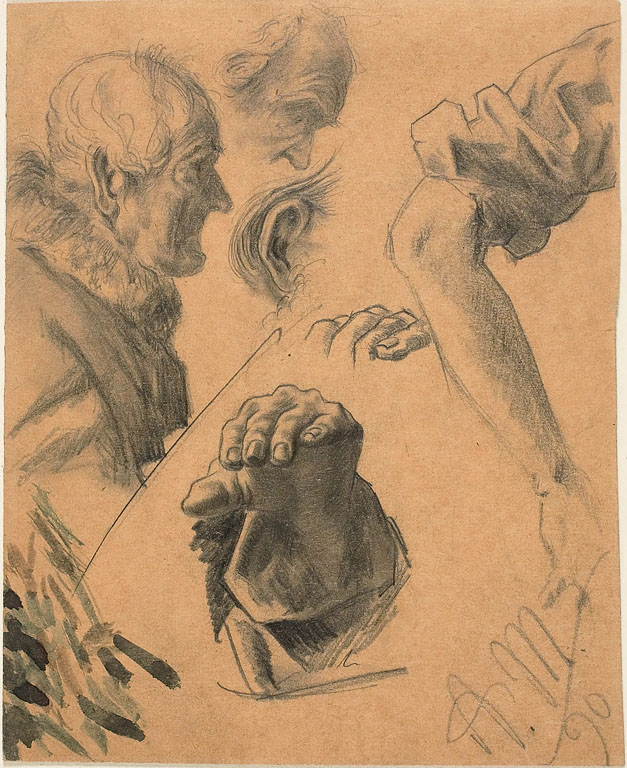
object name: Drawing and Watercolor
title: Sketches of Hands, Arms, and Heads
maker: Adolph Menzel; German, 1815–1905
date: 1890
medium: Graphite, with touches of watercolor, on tan wove card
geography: Germany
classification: graphite; drawings (visual works); prints and drawing